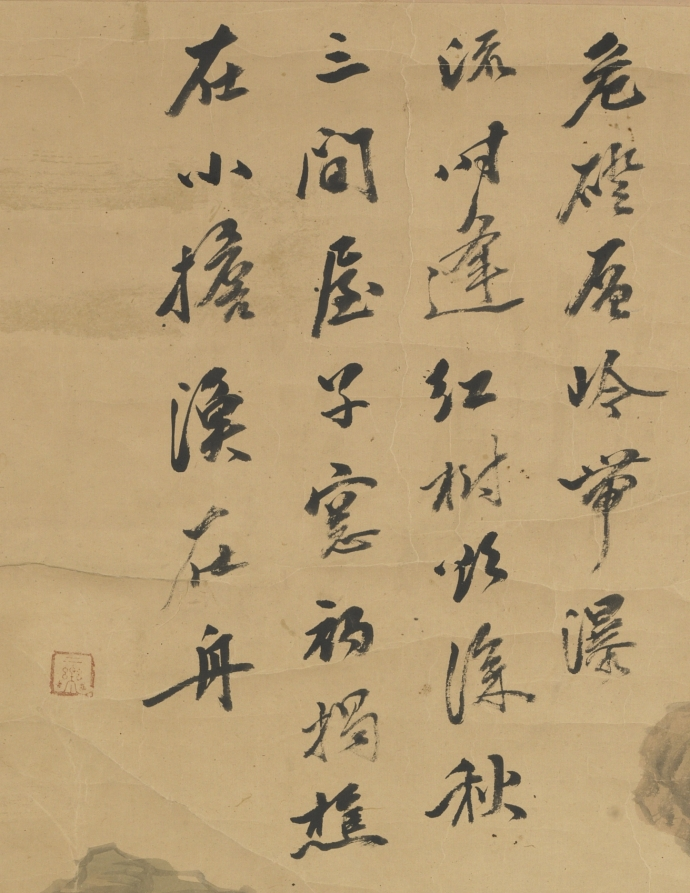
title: Landscape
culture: Japan, Edo period (1615–1868) or Korea, Joseon dynasty (1392–1910)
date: 1800s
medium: Ink and color on paper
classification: Painting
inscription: 二斎印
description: The artist of this landscape painting follows a tradition called the Southern school (南宗画). Generally, painters of the Southern school worked with monochrome ink and light colors, emphasizing calligraphic brushstrokes.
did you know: The artist of this landscape painting follows a tradition called the Southern school (南宗画), a stylistic term used to refer to intentionally unpolished amateur painting popular across East Asia around the late 1700s and afterwards.